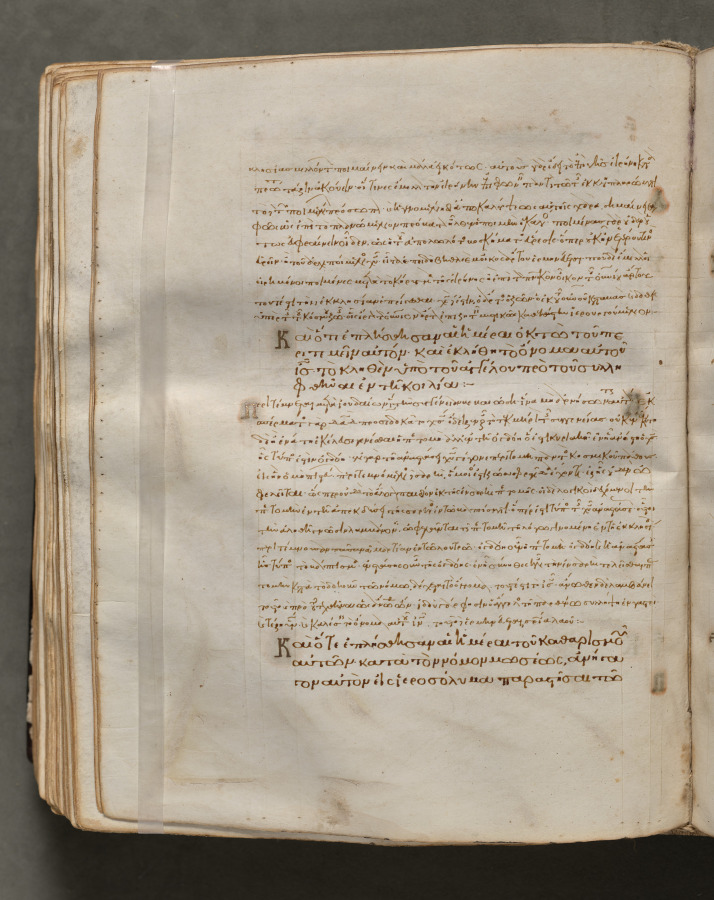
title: Text, folio 209 (verso), from a Gospel Book with Commentaries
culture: Byzantium, Constantinople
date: c. 1000–1100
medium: ink, tempera, and gold on vellum; leather binding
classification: Bound Volume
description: Each of the four gospels in this book opens on a page with brilliantly illuminated borders depicting the author of the text as well as birds-principally peacocks, symbols of the immortality of the soul-and fountains, representing the fountain of life and the salvation of the soul. This volume consists of 428 leaves with texts in Greek. Its level of sophistication suggests that it was probably written and decorated in a monastery in Constantinople.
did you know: Gospel Books were carried in procession through Byzantine churches.